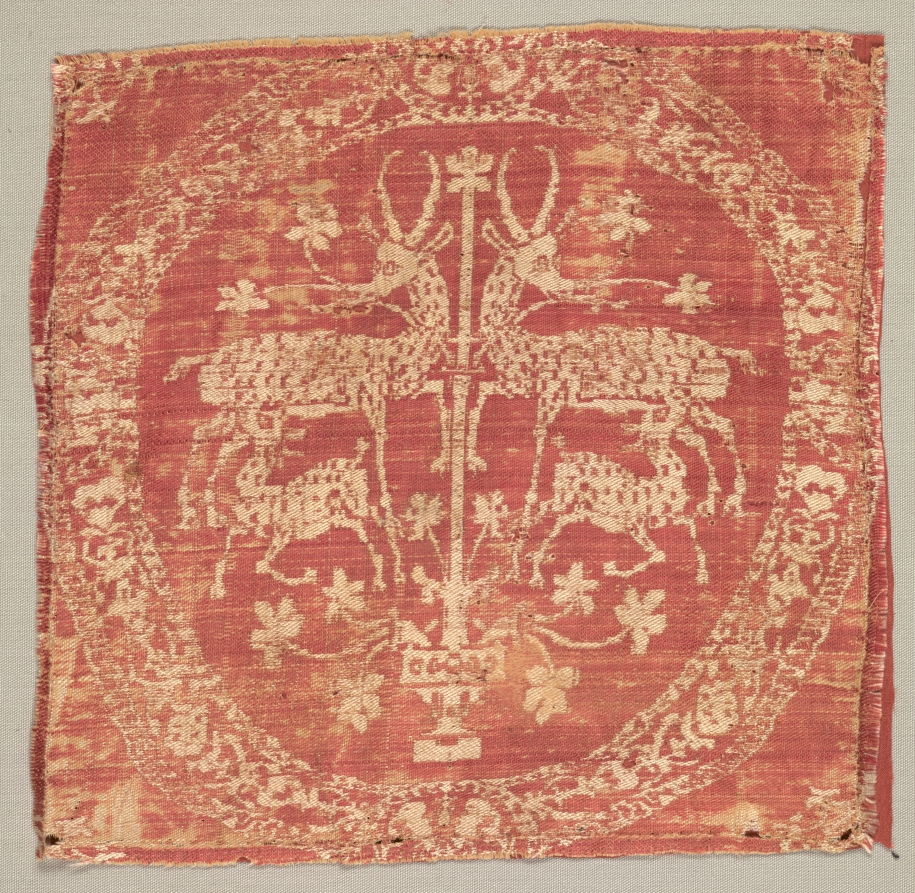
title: Square Ornament from a Tunic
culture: Egypt or Syria, Umayyad period (661–750) or Abbasid period (750–1258)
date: 700s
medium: Silk; complementary weft-faced twill weave with inner warps (samite)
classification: Textile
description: The folded edges on all four sides of this luxury silk fragment indicate that it decorated a unisex linen tunic. The symmetrical deer with suckling fawn flanking a simplified central tree of life continues an ancient theme in a naturalistic style. The roundel is connected on all four sides and displays heart-shaped floral borders. This fragment is said to have been found in Akhmim, Egypt, south of Cairo, where, during the 1880s, numerous related silk fragments were excavated.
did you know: Seen as a prized decoration, designs like this were often cut out of older textiles and stitched onto unisex linen tunics.